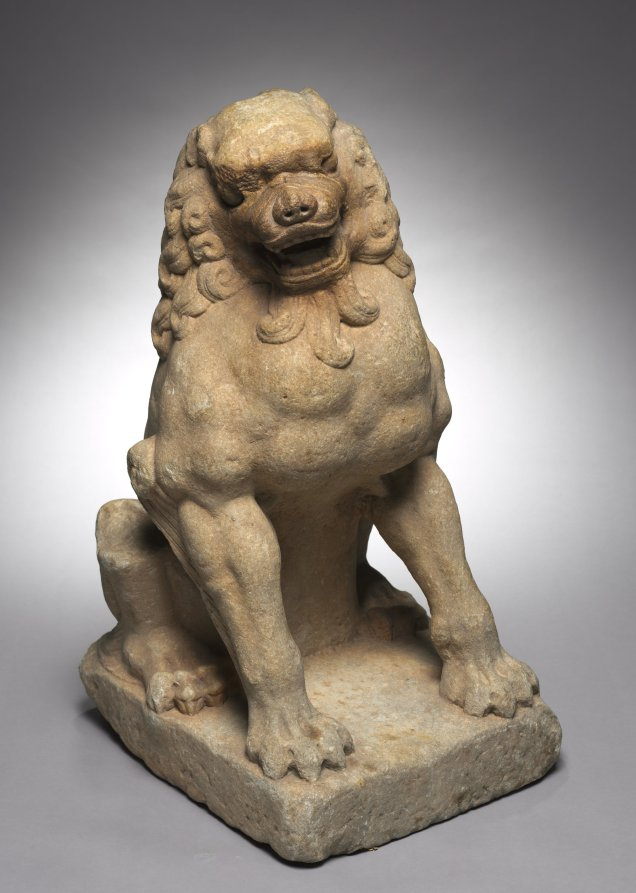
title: Guardian Lion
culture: China, Tang dynasty (618-907)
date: c. 600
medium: white marble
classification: Sculpture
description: Lion sculptures like this example are often found at the entrance to Buddhist temples in China. It may seem as if they are there to protect the temple. Lions also have had strong associations with Buddhism since the religion’s origin; the dharma, or Buddhist doctrine, is said to be spread through his roar.